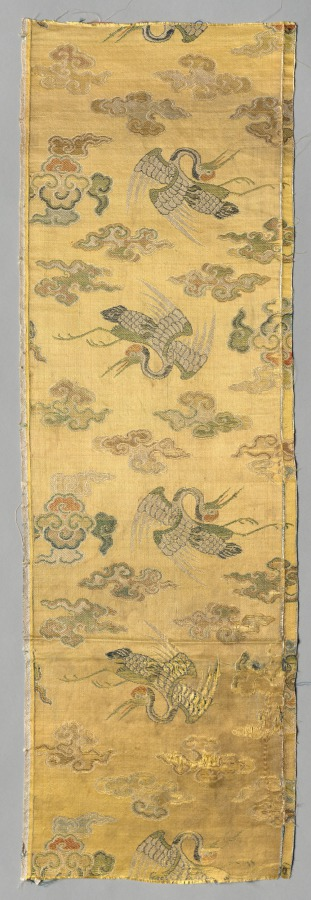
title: Fragment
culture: China, 18th century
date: 1700s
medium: satin ground; silk diasper weave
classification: Textile